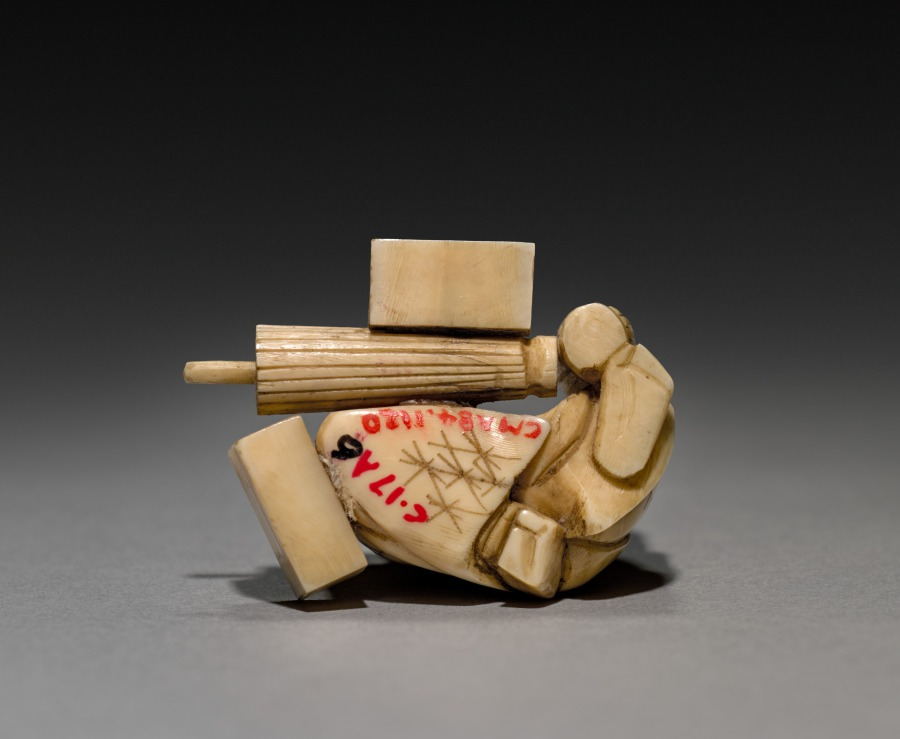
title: Parasol Vendor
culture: Japan, Meiji period (1868–1912)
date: late 1800s-early 1900s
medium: ivory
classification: Ivory